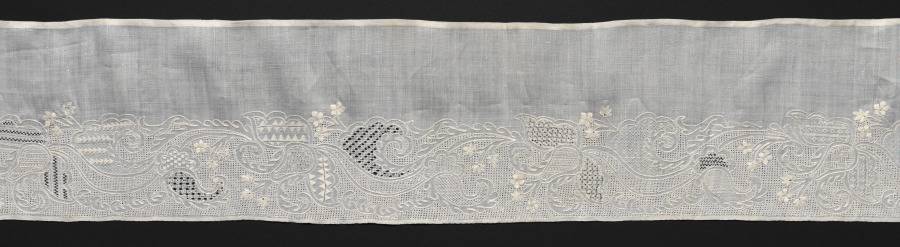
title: Embroidered Band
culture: France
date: 1800s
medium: Plain weave linen: needle lace (cutwork and drawnwork) and embroidery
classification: Embroidery